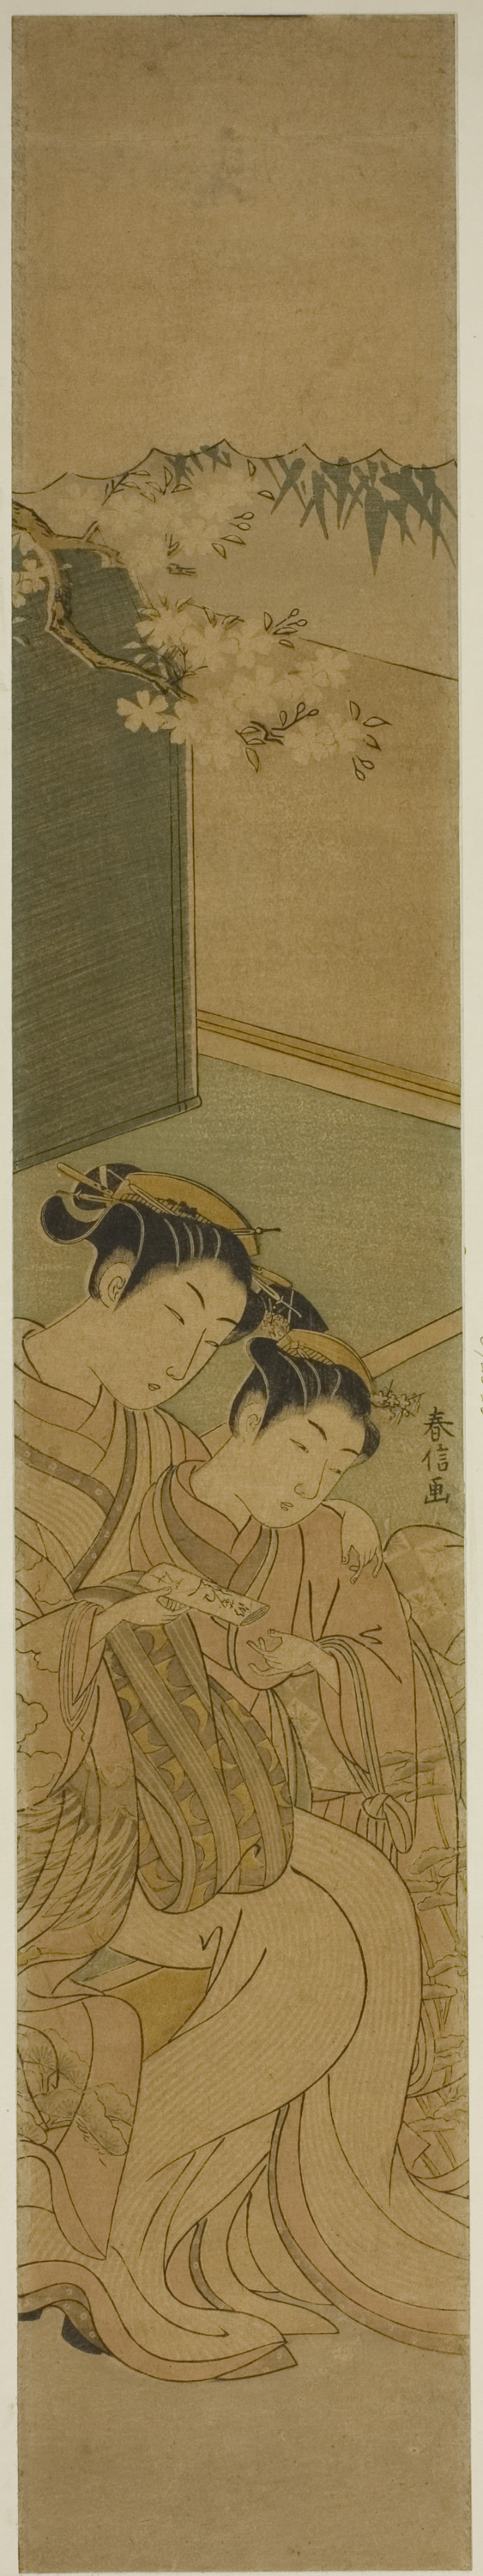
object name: Print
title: The Love Letter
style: Japanese (culture or style)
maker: Suzuki Harunobu 鈴木 春信; Japanese, 1725 (?)-1770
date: c. 1769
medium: Color woodblock print; hashira-e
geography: Japan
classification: woodblock print; print; asian art